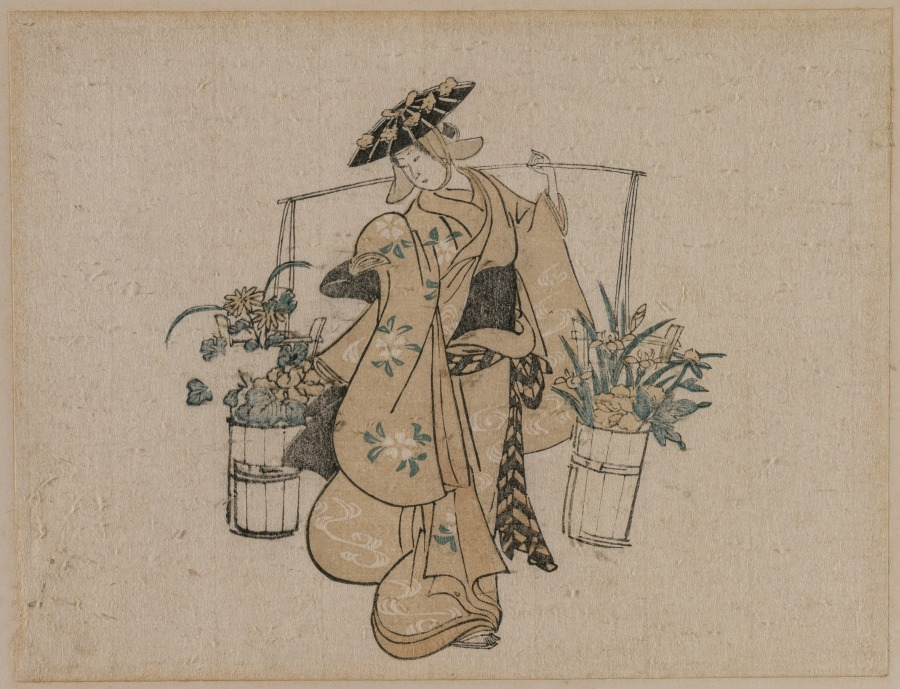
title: A Beauty Carrying Two Buckets of Flowers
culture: Japan, Edo period (1615–1868)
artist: style of Torii Kiyomasu (Japanese)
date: c. 1696–1716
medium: color woodblock print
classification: Print